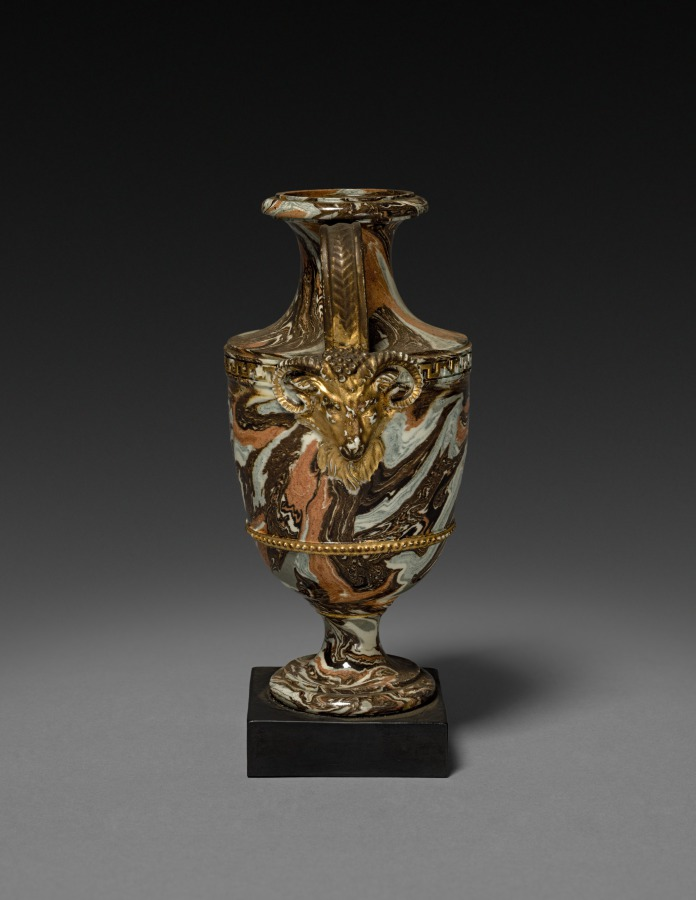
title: Urn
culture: England, late 18th or 19th century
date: late 1700s - 1800s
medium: earthenware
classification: Ceramic